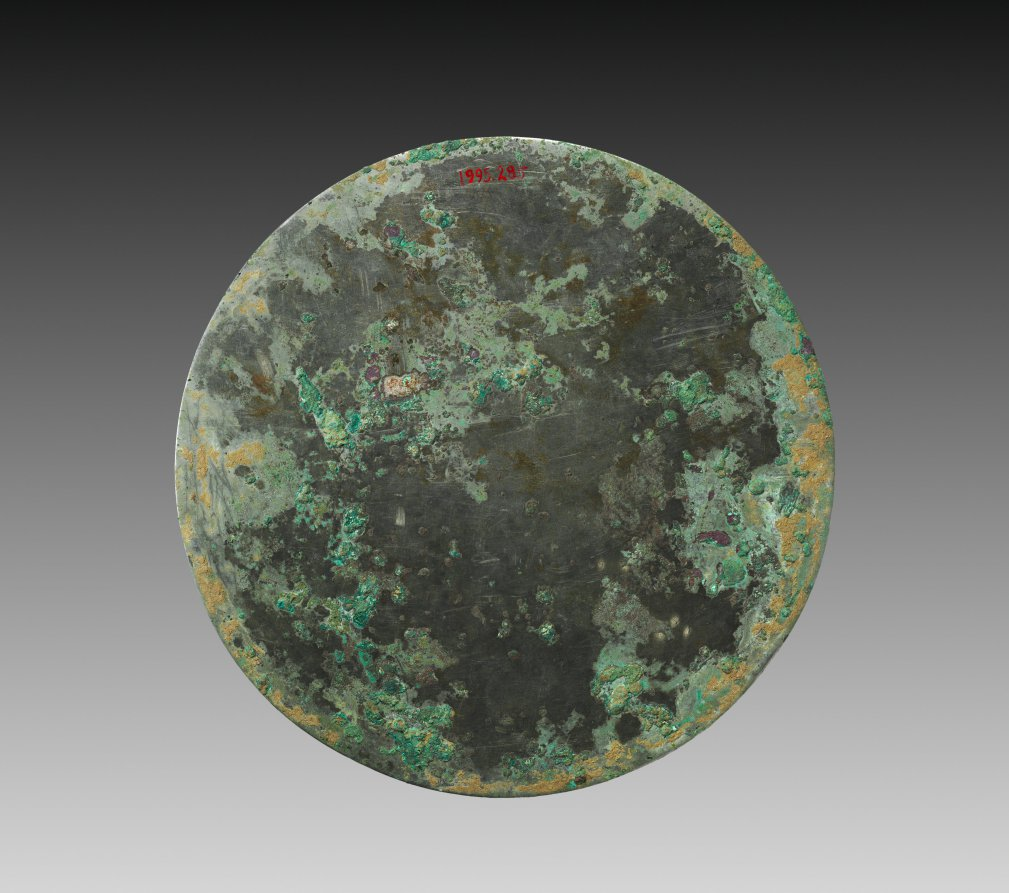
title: Mirror with a Square Band, Four Nipples, and Grass Leaf Motifs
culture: China, Western Han dynasty (206 BCE–8 CE)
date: 100s BCE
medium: bronze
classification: Metalwork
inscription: 長貴富，宜酒食，樂母事，日有熹。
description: Inscription: May you enjoy lasting fortune. May you enjoy wine and food. May you enjoy freedom from worry. May your days be replete with happiness.